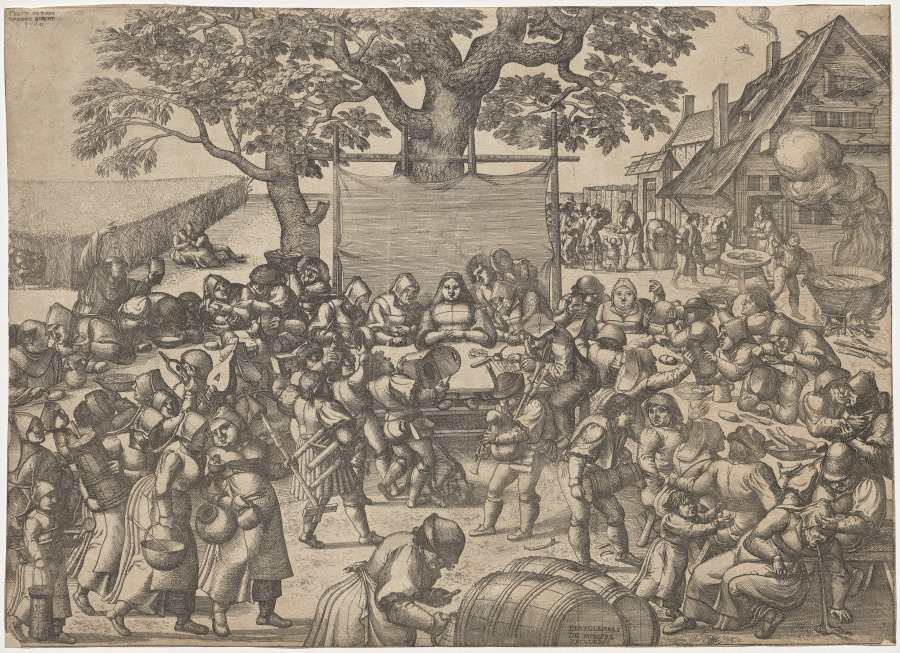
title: The Large Wedding Feast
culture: Netherlands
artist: Peeter van der Borcht (Netherlandish, c. 1535–1608)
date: 1560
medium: etching with engraving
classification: Print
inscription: Signed and dated in upper left corner: FECIT PETRVS VANDER BORCHT. 1560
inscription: With publisher’s address: BERTOLEMEES DE MOMPRE EXCVDEBAT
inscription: In black ink on verso: "ZBiernacki 1902"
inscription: Watermark: post-horn in a coat of arms, very similar to Briquet 7862 (Brabant 1593 and Middelbourg 1591) but larger (54 x 43 mm).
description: This 1560 etching by Antwerp artist Peeter van der Borcht is an important part of a tradition depicting peasant fairs, customs, and scenes of daily life with origins in the Low Countries in the 16th century. The protagonist of this expansive scene is the bride, who is seated at the table in the center of the composition. She sits with her arms crossed, wearing a placid expression. There is no food or drink at her table despite the plentiful victuals around her. According to Netherlandish custom, the bride was not permitted to eat or drink until the arrival of the bridegroom, which traditionally took place in the evening.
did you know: Just as today, the couple receives gifts from wedding guests; here, a clerk at the table counts coins while a line of guests wait their turn to present gifts including a salt cellar, stool, candleholder, stockpot, butter churn, distaff, bellows, tongs, and pots.